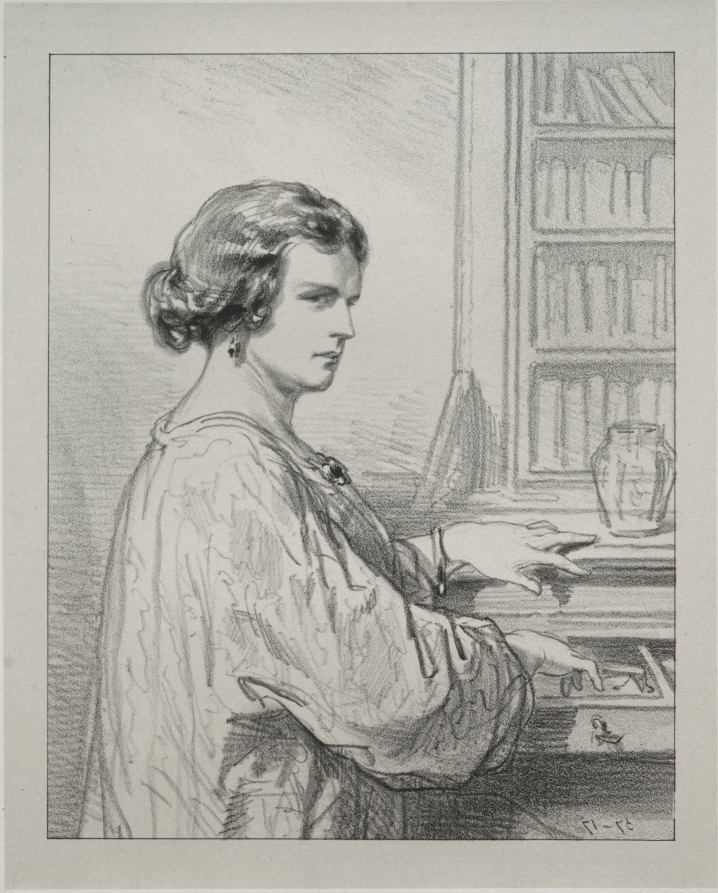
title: Par-ci, par-lá: The Boudoir key opens many secrets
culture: France, 19th century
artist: Paul Gavarni (French, 1804–1866)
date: 1854–1856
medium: lithograph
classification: Print